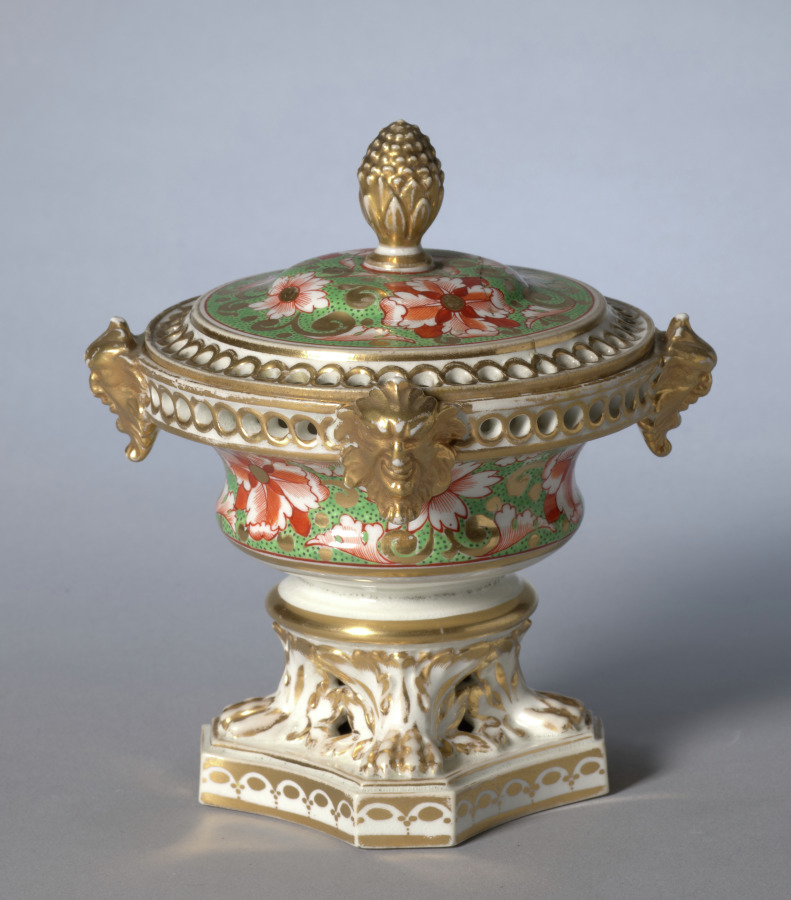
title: Potpourri Vase with Cover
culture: England, Derby, 19th century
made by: Derby (Crown Derby Period) (British)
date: c. 1810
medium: porcelain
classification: Ceramic